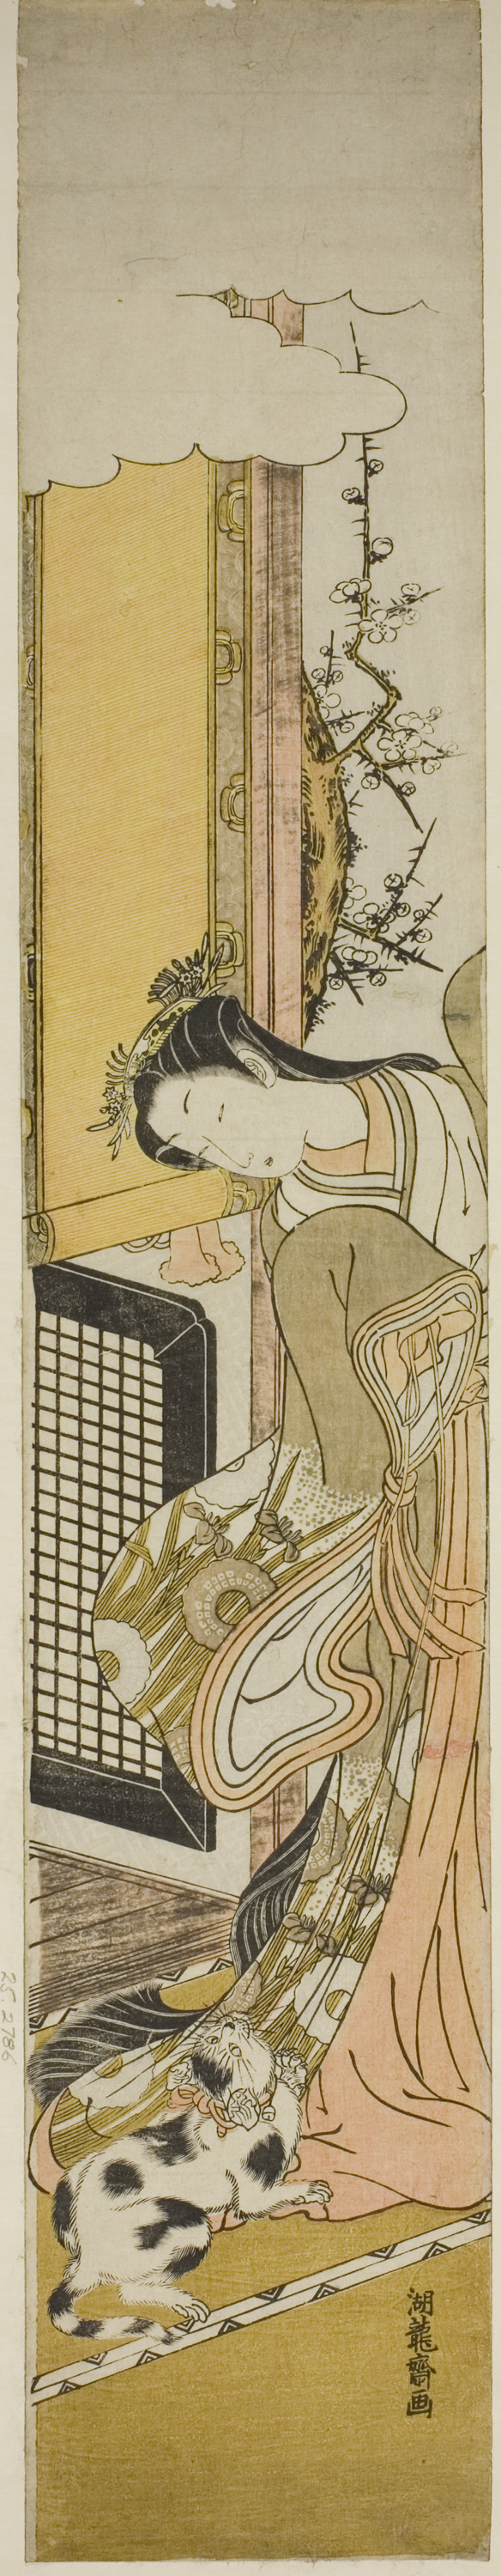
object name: Print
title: Parody of the Third Princess and Her Pet Cat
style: Japanese (culture or style)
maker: Isoda Koryusai (Japanese, 1735-1790)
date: c. 1772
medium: Color woodblock print; hashira-e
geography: Japan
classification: woodblock print; print; asian art